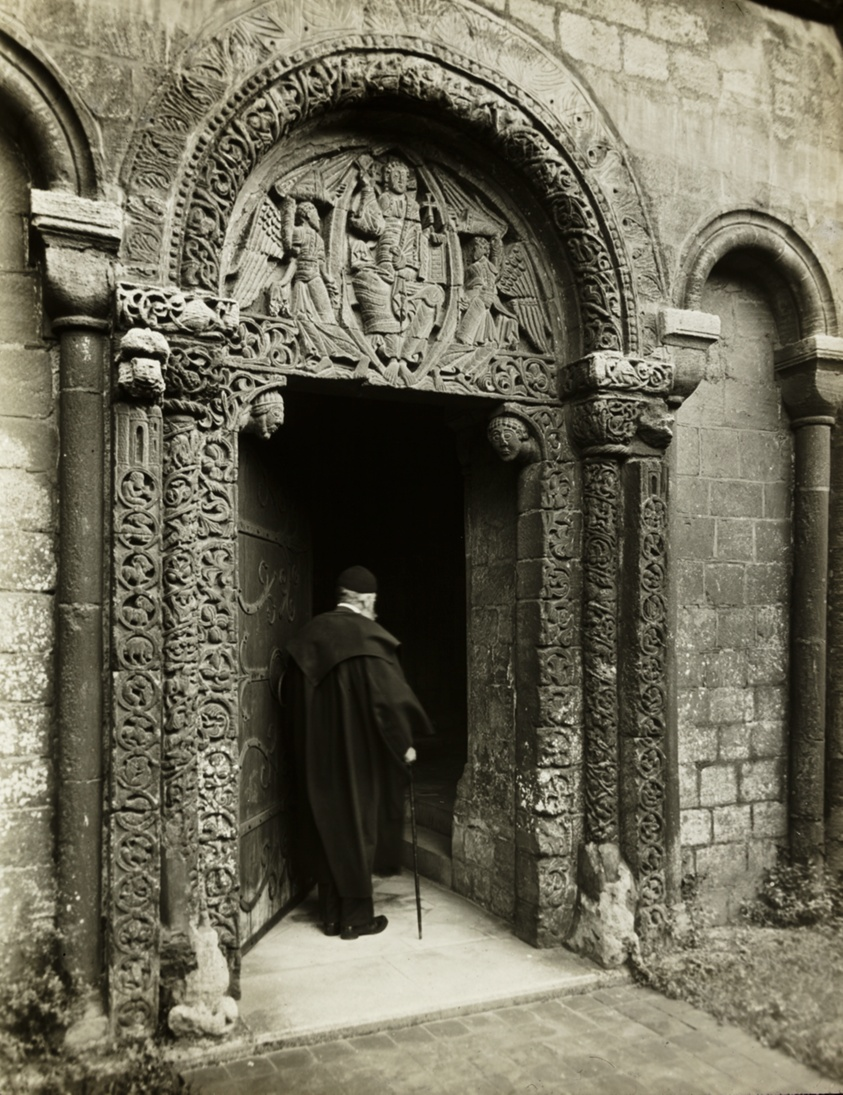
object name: Photograph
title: Ely Cathedral: Prior's Door, with Bedesman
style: Pictorialism, 19th century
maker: Frederick H. Evans (English, 1853–1943)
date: 1891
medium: Lantern slide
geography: England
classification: photograph; photography